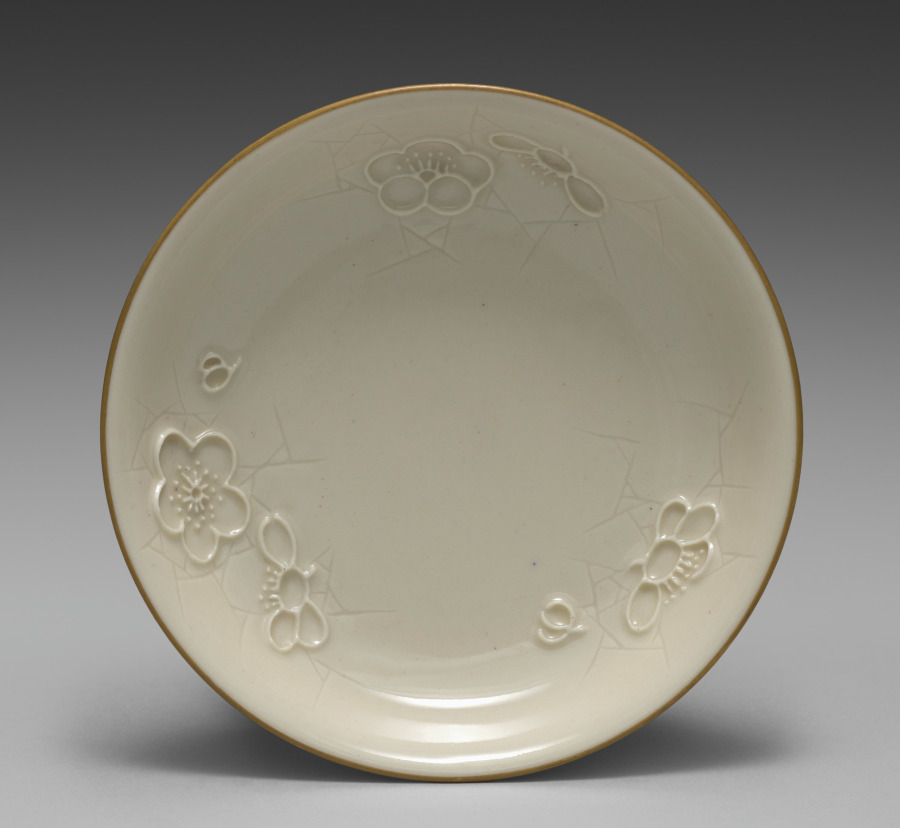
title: Small Dish from Dining Set with Plum Blossoms and Cracked-Ice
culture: Japan, Meiji period (1868–1912)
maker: Seifū Yohei II (Japanese, 1844–1878)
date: c. 1875–78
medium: Porcelain with molded designs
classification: Ceramic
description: Each item in this set has a delicate low-relief design of flowering plum branches over scattered, intersecting lines meant to resemble the cracked-ice surface of a frozen body of water and is signed on the base in gold pigment. While Yohei II produced many fine works in underglaze blue, like those produced by Kiyomizu Shichibei, he also made works in quite different styles later in his career, from the early 1870 s. In 1873, he was appointed purveyor to the Industrial Center of Kyoto Prefecture, a designation associated with Kyoto’s efforts to reach an international market through the port of Kobe; and from 1875 until his death, he was involved in national-level projects to present Japanese ceramics across the world. It was during this period that Yohei III was apprenticed to Yohei II, and it has been suggested that this set may in fact be an early example of Yohei III’s work, which he signed with his teacher’s name. Decorated with flowers resembling Japanese textile motifs, the set calls to mind the design of Yohei II’s pair of vases with plum blossoms in the Victoria and Albert Museum. Here, the elaborate trees created for a formal public exhibition setting have been translated into the approachable blossoms of the genteel domestic environment. While the designs are consistent across the pieces, each raised flower petal and pistil and each incised line in the ice was done by hand, so the cups, bowls, and dishes are similar yet unique. The bottoms of two boxes once identified the set’s owner, but the information has been deliberately obscured with black ink. However, inscriptions still visible appear to indicate two occasions, once at the end of July 1886 , and once again in June 1916 , when parts of the set were requested from Hokura in Niigata Prefecture. The location corresponds to a neighborhood in the present-day city of Jōetsu. The surname Tsuji 辻 also appears on a paper tag affixed to one of the box cloths. Future research may possibly reveal more about their provenance. A vase by Yohei III in a private collection combines the formal grandeur of the Yohei II vases in the Victoria and Albert Museum with the gentler design of this dining set, placing flowering plum trees against soft, scalloped-edge clouds resembling those in golden screens.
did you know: The dining wares have a creamy white coloration that the four boxes containing them identify as Korean in style.